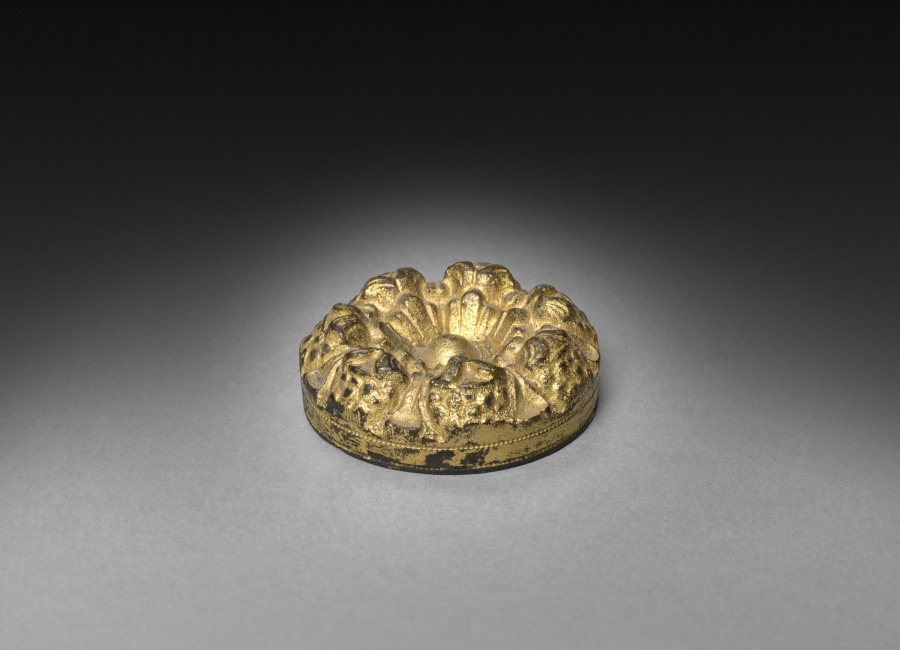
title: Inkwell (top to bottle)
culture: England or America, 19th century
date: 1825–1850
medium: gilt bronze and glass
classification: Metalwork